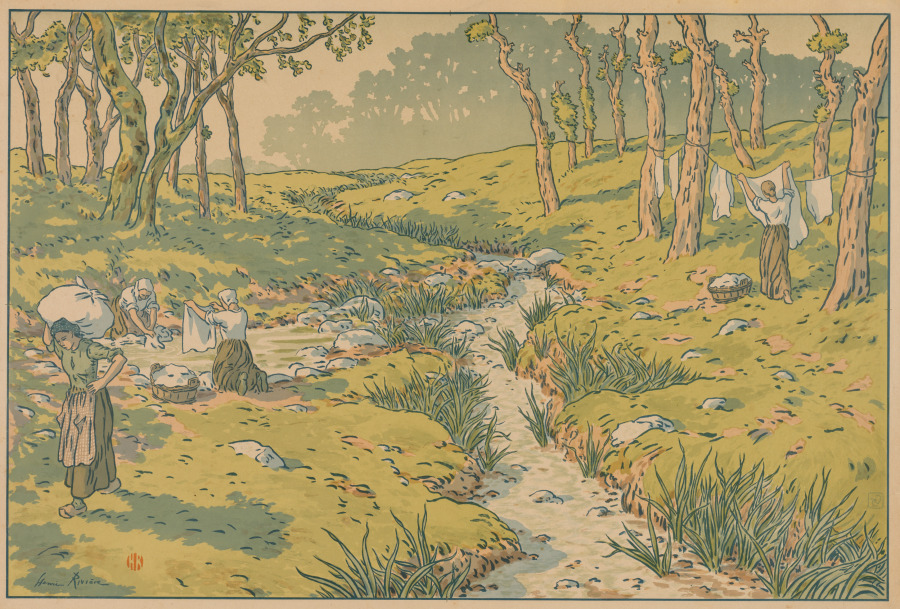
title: Aspects of Nature: The Stream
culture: France, 19th century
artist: Henri Rivière (French, 1864–1951)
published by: Printed by Verneau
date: 1898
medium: color lithograph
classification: Print